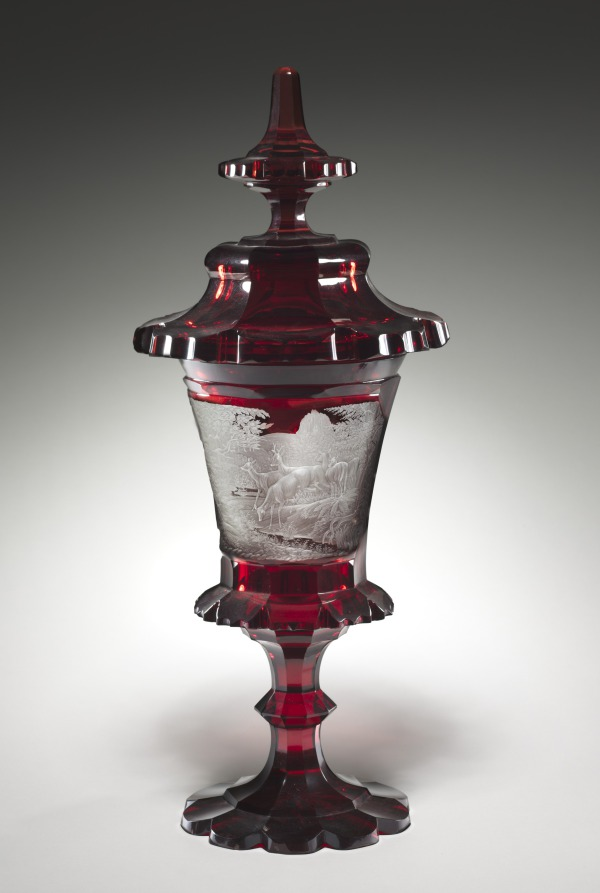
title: Covered Cup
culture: Bohemia, 19th century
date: mid-1800s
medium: ruby glass with engraved decoration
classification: Glass